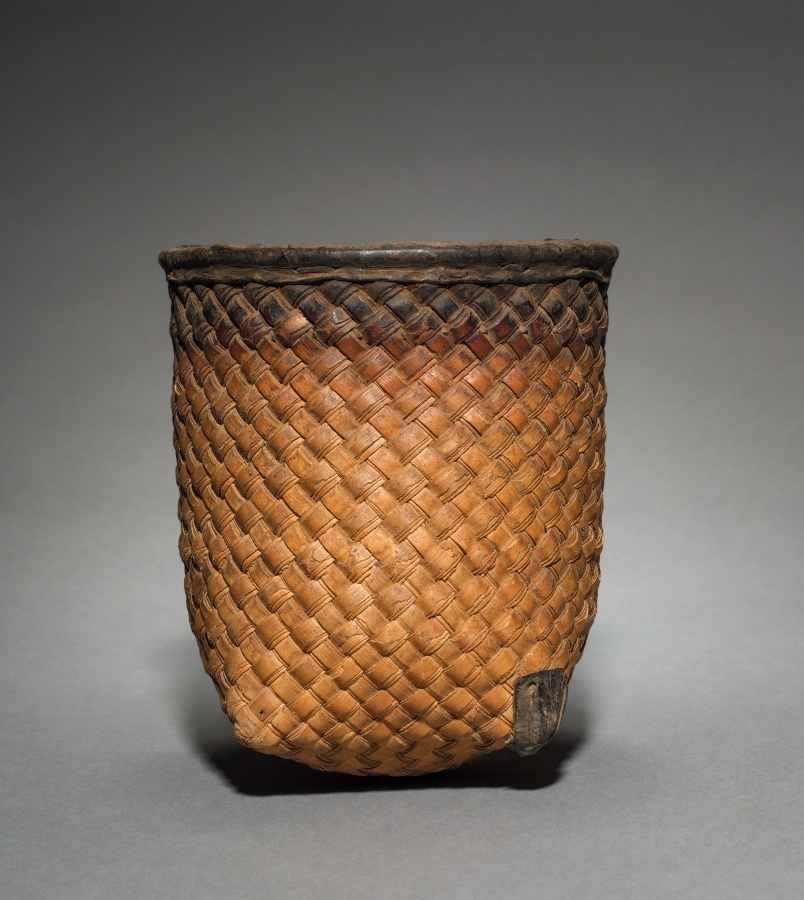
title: One of Ten Nesting Wedding Baskets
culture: Africa, Western Sudan, Burkina Faso, Lobi, 20th century (?)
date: c 1900s ?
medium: Plant fiber and leather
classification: Vessels